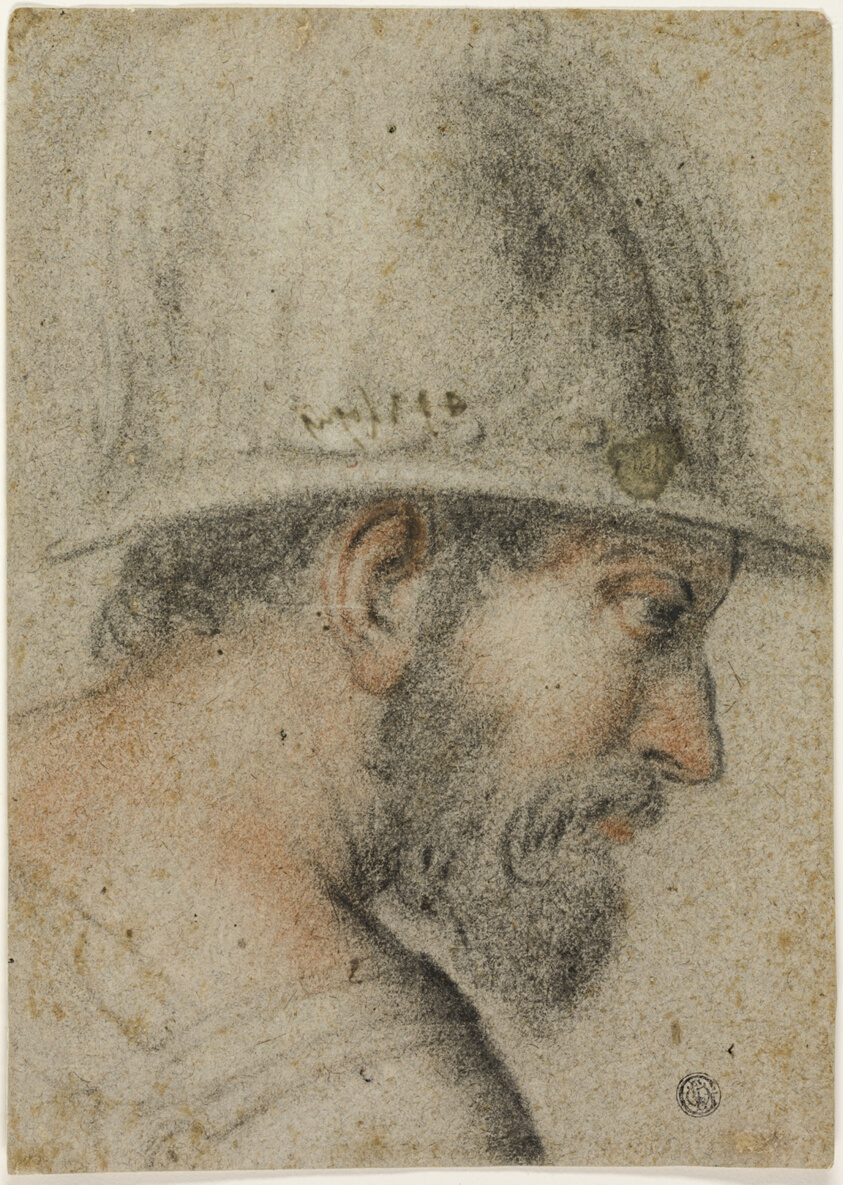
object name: Drawing and Watercolor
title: Profile Head of a Soldier with Helmet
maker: Attributed to Gabriele Caliari; Italian, 1568-1631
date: 1588/96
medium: Red and black chalk on gray-brown laid paper, laid down on cream laid paper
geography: Italy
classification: chalk; drawings (visual works); prints and drawing